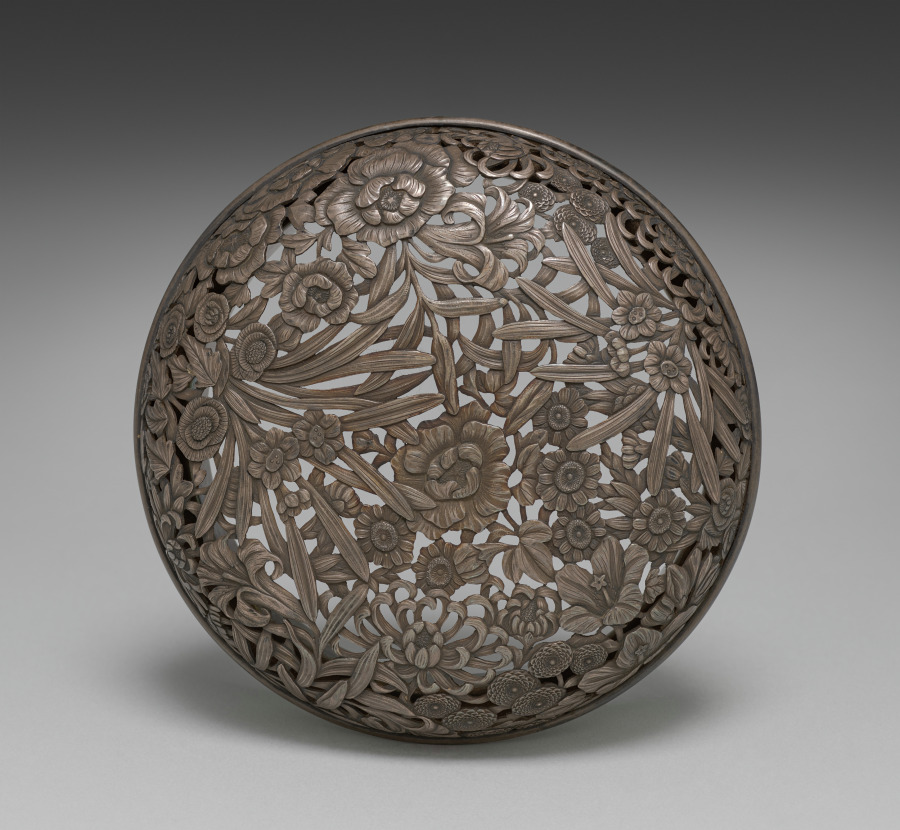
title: Lid for an Incense Burner with Peony and Cloud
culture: Japan, Meiji period (1868–1912)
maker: Seifū Yohei III (Japanese, 1851–1914)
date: 1914–46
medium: Floral openwork silver lid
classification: Ceramic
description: Yohei IV’s incense burner has a scrolling floral pattern of peonies and nyoi staff-head forms around the body and a band of clouds around the collar. These are done in low relief, with incised lines marking the details in the flower petals and leaves. The silver lid has a proliferation of flowers, including lily, peony, and a variety of chrysanthemums. The box lid identifies the subtle pink over an ivory body as “dawn’s light[–glazed] porcelain” (shokōji). After he became an Artist of the Imperial Household, Yohei III created a number of glaze and clay combinations with what would have been considered Japan-focused names to be in alignment with his position as an artist representing the nation. Among them was a glaze called “dawn’s light pale [pink] color” (akebonoiro tansai), which he invented in 1895. It is possible that this incense burner is an example with this glaze, despite the slightly different name given on the box. While the name alludes to the Land of the Rising Sun, an epithet for Japan, the burner’s motifs remain very much drawn from the Chinese repertoire.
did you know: Seifū Yohei IV’s incense burner has a pale pink glaze named “dawn’s light.”